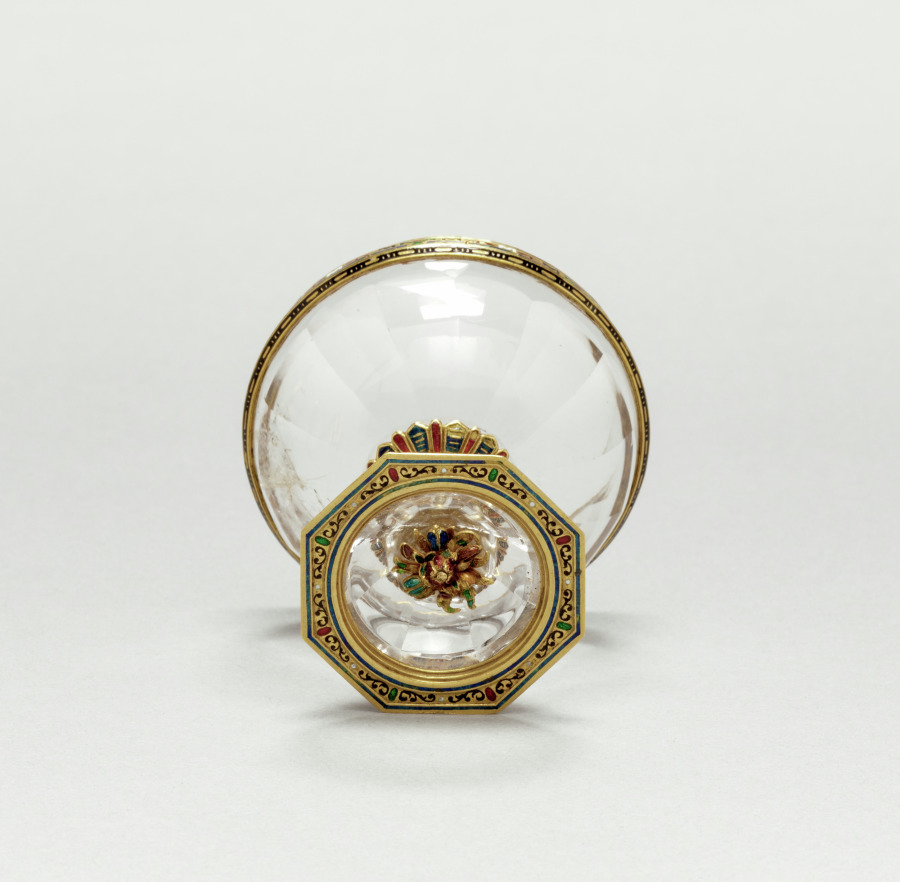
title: Double Cup (Lower Cup)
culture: Italy, late 16th century (possibly 19th century forgery, or 16th and 19th century pastiche)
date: late 16th century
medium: rock crystal set in enameled gold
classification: Enamel